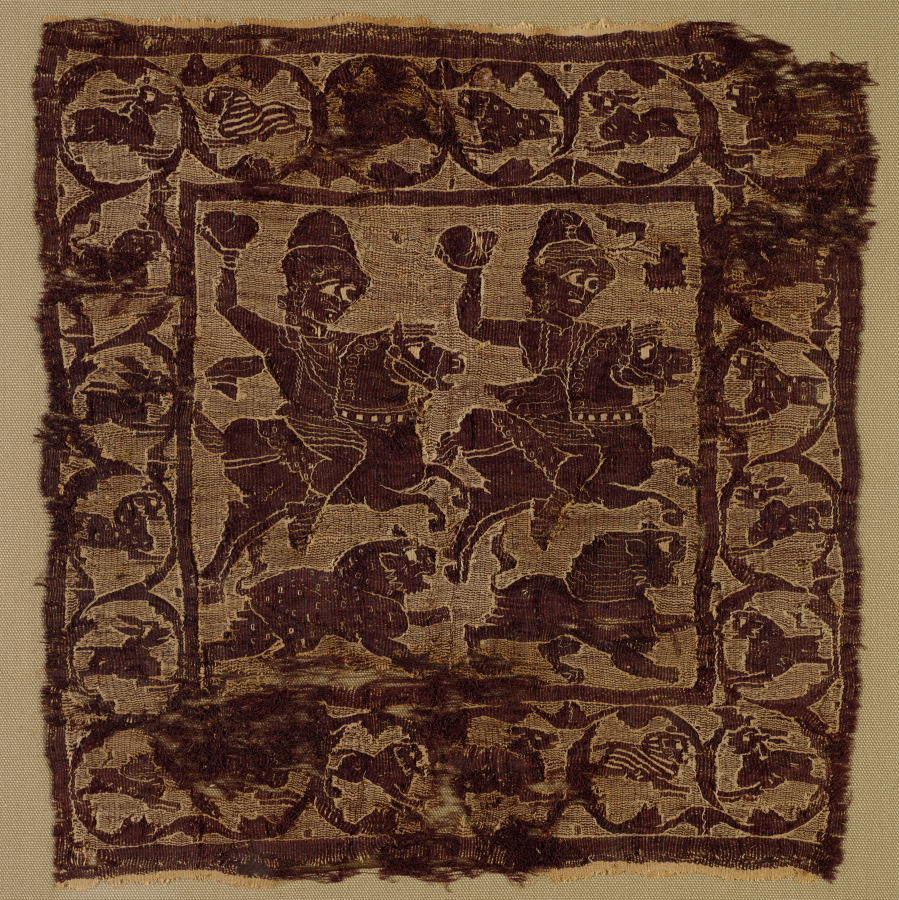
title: Ornamental Square from a Tunic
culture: Egypt, Byzantine period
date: 400s CE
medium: Linen, undyed; wool, dyed; tapestry weave with supplementary weft wrapping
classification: Textile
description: Riders dressed in hunting clothes and boots hurl rocks at fleeing lions. The man wears a short tunic and the woman has a fluttering skirt. The border consists of curved acanthus leaves that enclose a chase of alternating lions and hares. This square was sewn onto a tunic rather than woven in. Hunting was a popular artistic theme in pre-Islamic traditions, including Byzantine art, and was then adopted into Islamic art.